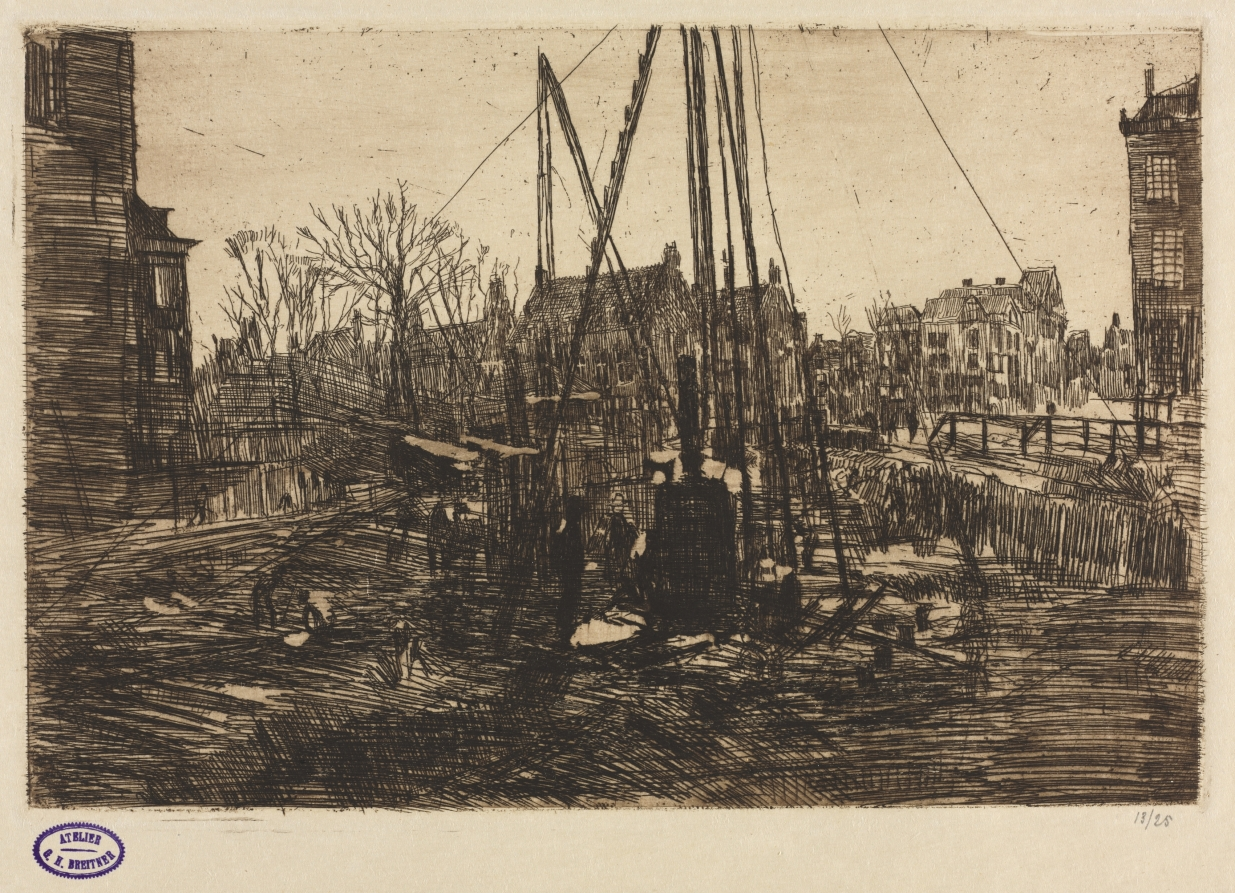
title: Building Site, Amsterdam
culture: Netherlands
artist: George Hendrik Breitner (Dutch, 1857–1923)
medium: etching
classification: Print